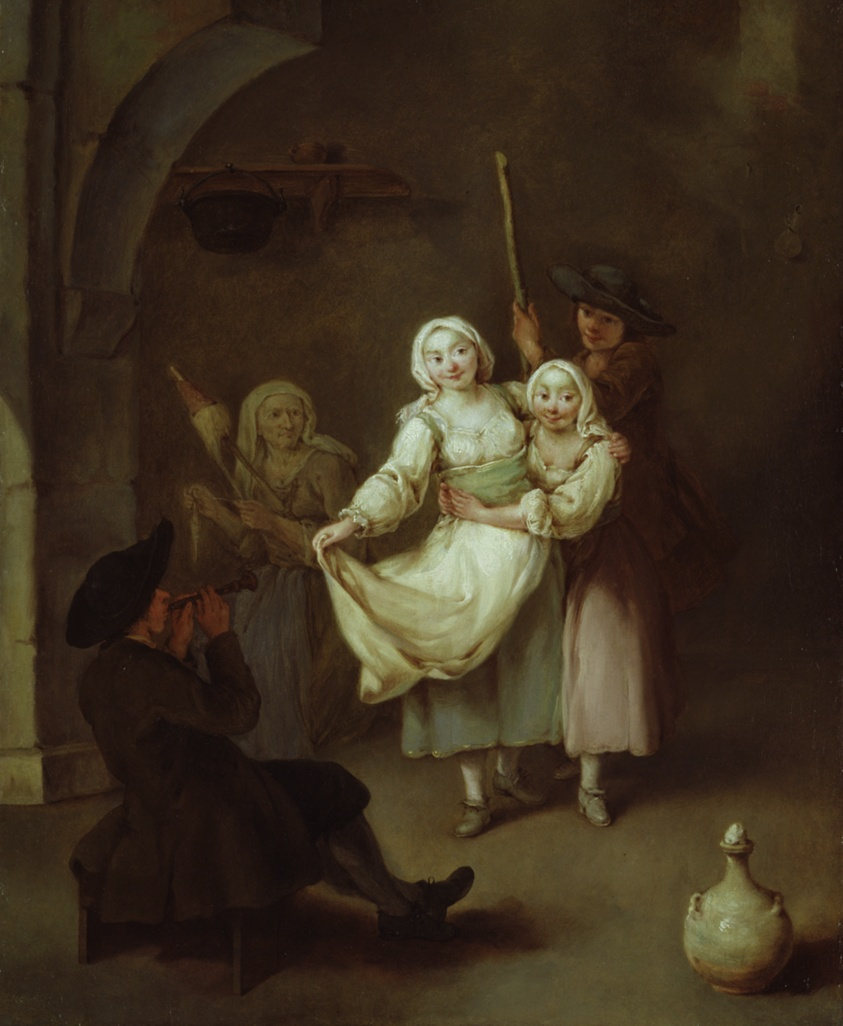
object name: Painting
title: The Dance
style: 18th Century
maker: Pietro Longhi (Italian, 1702–1785)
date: c. 1750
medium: Oil on canvas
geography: Italy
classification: oil on canvas; Italian; oil paintings (visual works); paint; painting; european painting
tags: dance, jug, musical instruments, interior, leisure, people, men, man, women, woman, Century of Progress, world's fairs, Chicago World's Fairs